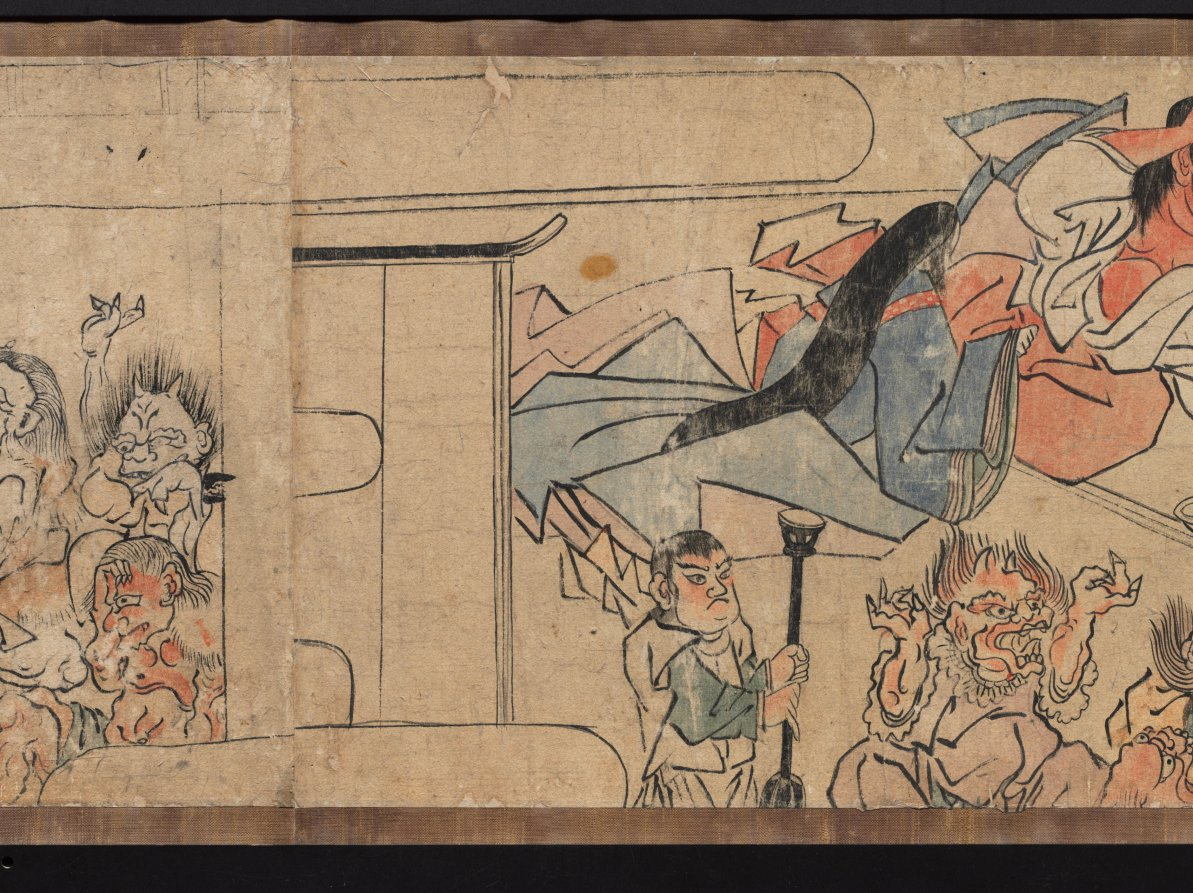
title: Oeyama Engi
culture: Japan, Edo period (1615–1868)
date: 1615–1868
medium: one of a pair of handscrolls; ink and color on paper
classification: Painting